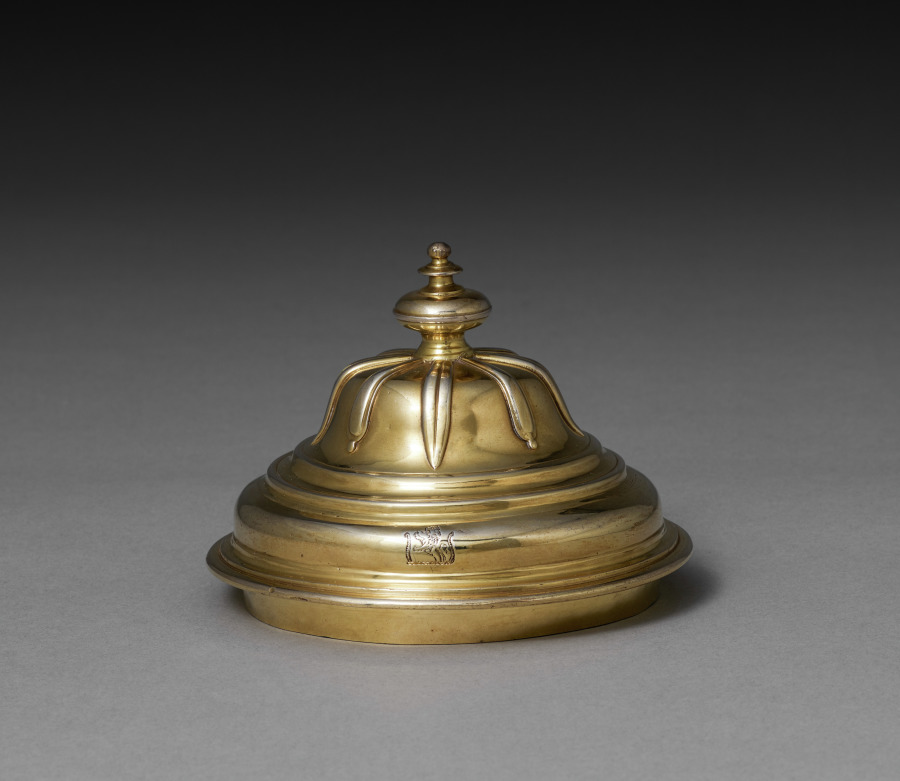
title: Covered Cup (cover)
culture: England, London, 18th century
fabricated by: Gabriel Sleath (British, 1674–1756)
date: 1723–1724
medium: silver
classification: Silver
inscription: engraved in the center of the cup is a demi-lion, rampant passant, holding an unknown object on an irregularly shaped shield surrounded by baroque manteling. In style, it is appropriate for date of cup but does not appear a true coat of arms. On the lid is a crest consisting of a demi-lion, rampant passant, between open buffalo horns. These heraldic devices perhaps refer to some entity rather than an individual.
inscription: Hallmarks stamped on lid: "G", two unidentifiable, "H".